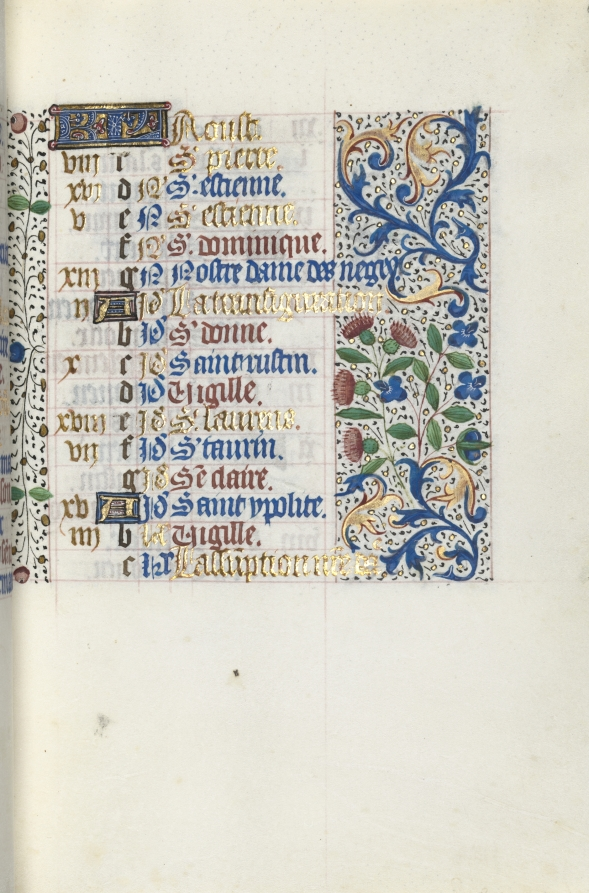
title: Book of Hours (Use of Rouen): fol. 8r, Calendar Page for August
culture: France, Rouen, 15th century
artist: Master of the Geneva Latini (French, active Rouen, 1460–80)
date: c. 1470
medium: ink, tempera, and gold on vellum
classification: Bound Volume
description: In the late 1400s and early 1500s Rouen was an established and important center of book production. The city’s cathedral had a wealthy chapter that spent large sums of money to commission books and to maintain its extensive library. The stationers and booksellers would have likely been concentrated in or near the cathedral precinct. This artist, named after a manuscript now in Geneva, was Rouen’s principal illuminator during the second half of the 1400s.